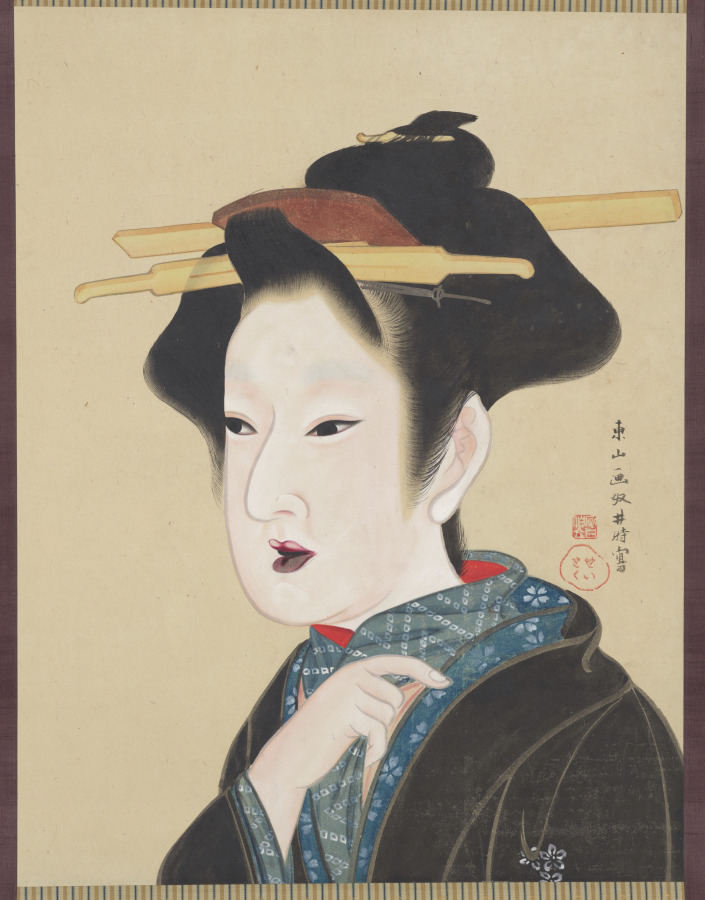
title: A Beauty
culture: Japan, Edo period (1615–1868)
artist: Gion Seitoku (Japanese, active late 1700s–early 1800s)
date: early 1800s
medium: hanging scroll; ink and color on paper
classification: Painting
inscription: 東山画奴井特寫 「字日伯立」白文方印・「せいとく」朱文千鳥印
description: A Kyoto-based ukiyo-e painter, Gion Seitoku specialized in portraying women from Gion and Shimabara, licensed brothel districts in that city. He was known for detailing faces with subtle modeling to heighten a sense of realism. During the 1700s and 1800s, wearing iridescent, greenish lip gloss made from safflower was in vogue. In addition, Japanese women almost universally practiced the custom of artificially blackening their teeth with a stain.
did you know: The person's lipstick is made from safflower.